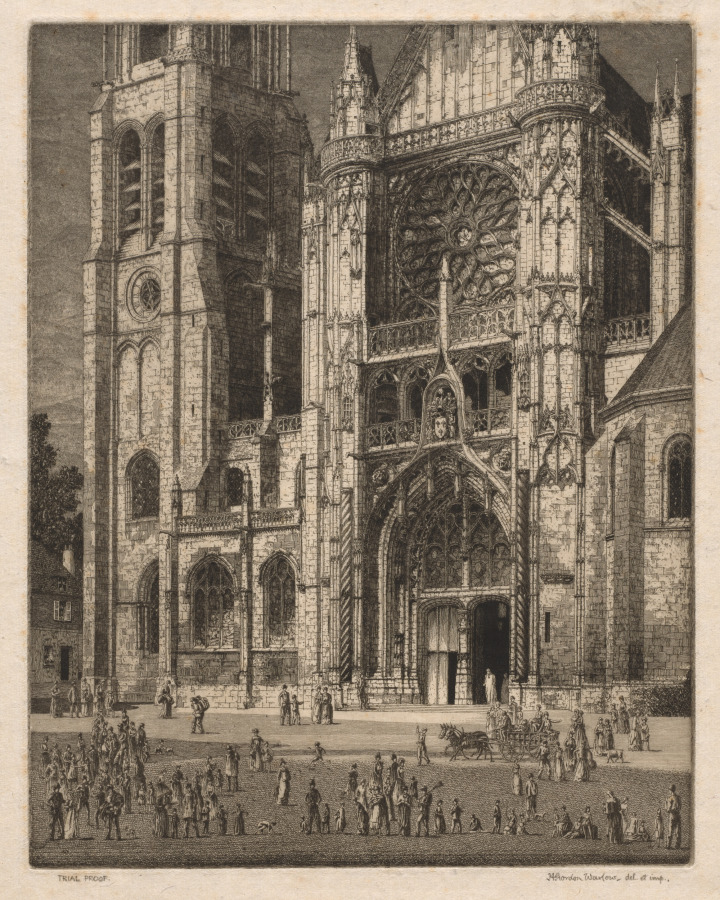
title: Sevins Cathedral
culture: England, 20th century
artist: Herbert Gordon Warlow (British, 1885–1942)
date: c. 1930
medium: etching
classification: Print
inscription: Lower left, in ink: TRIAL PROOF; lower right, in ink: H. Gordon Warlow, del. et imp.; lower left corner, in graphite: Sevins Cathedral